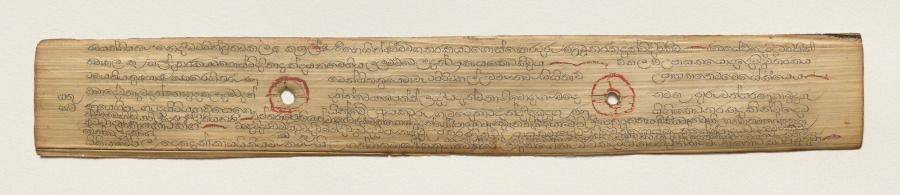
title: Leaf from a Buddhist Manuscript (recto)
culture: Sri Lanka, Singhalese, Late 17th century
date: c. 1700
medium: fiber paper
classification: Manuscript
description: Palm leaf material is still used for manuscripts in Sri Lanka. The palm leaves are prepared first by boiling them, drying them in the sun, and then rubbing them with oils. Scribes then use a metal stylus to incise the text. Then charcoal powder is wiped across the pages, filling in only the inscribed lines.